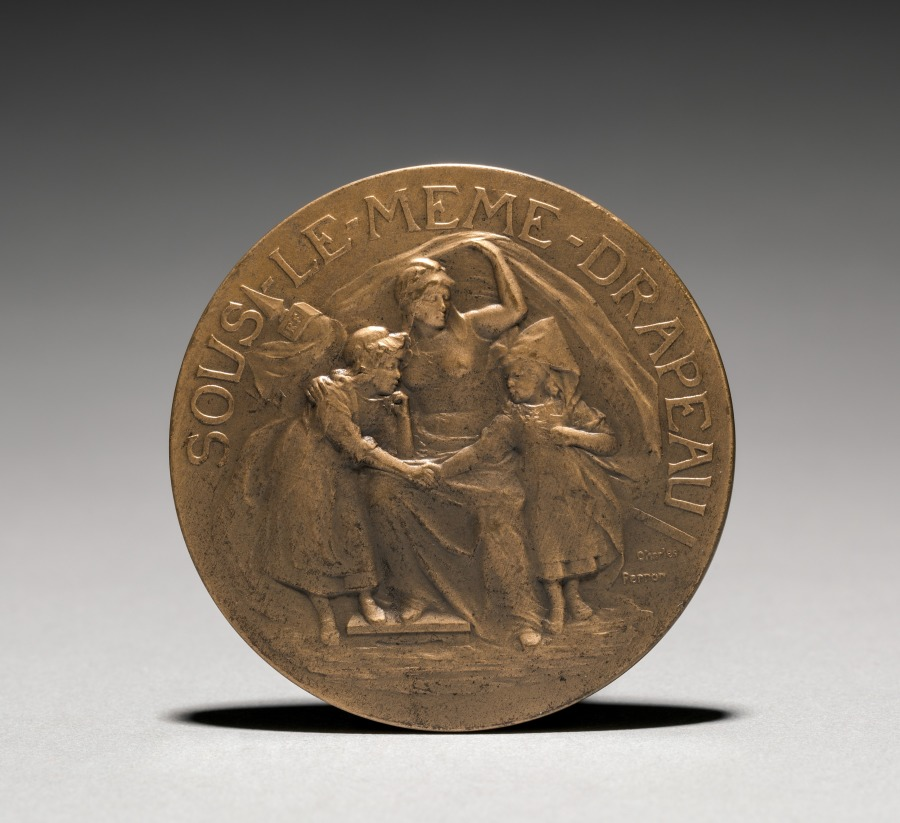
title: Medallion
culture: France, 19th-20th century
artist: Charles-Theodore Perron (French, 1862–1934)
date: ca. 1918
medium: bronze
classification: Metalwork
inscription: "SOUS LE MEME DRAPEAU" (Under the Same Flag); signed: "Charles Perron."